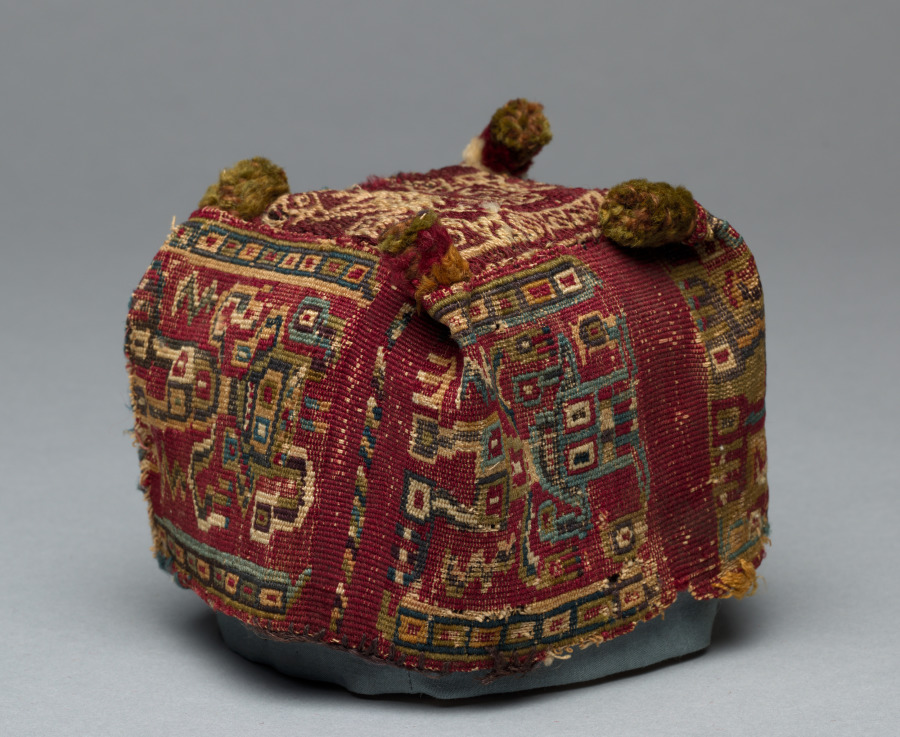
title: Four-Cornered Hat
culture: Peru, South Coast, Wari Culture, Middle Horizon, 8th-12th Century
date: c. 700–1100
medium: sides: cotton and wool plain cloth, brocaded; top: wool fancy cloth (?)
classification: Textile